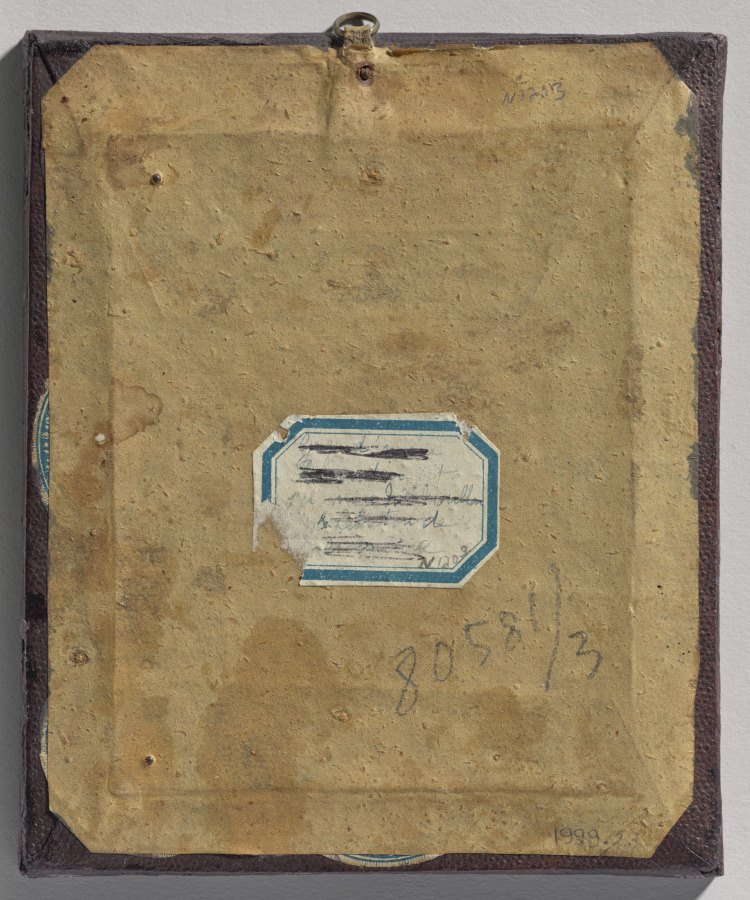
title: Child Standing on a Chair Holding Flowers, with Mother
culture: France, 19th century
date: c. 1855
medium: daguerreotype, quarter-plate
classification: Photograph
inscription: written in pencil on recto of frame:"80581/3"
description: Until the mid-1850s the daguerreotype process was the method preferred by the commercial photographers willing to meet the ever-growing demand for likenesses of family and friends. This daguerreotype captures the patience of a mother and child, who were required to hold their poses for some time during the exposure of the silver-coated copper plate. Only the bouquet of flowers held by the child is slightly blurred. Characteristic of the technique, the details in the image—fabric, facial features, and accessories—are clearly defined.